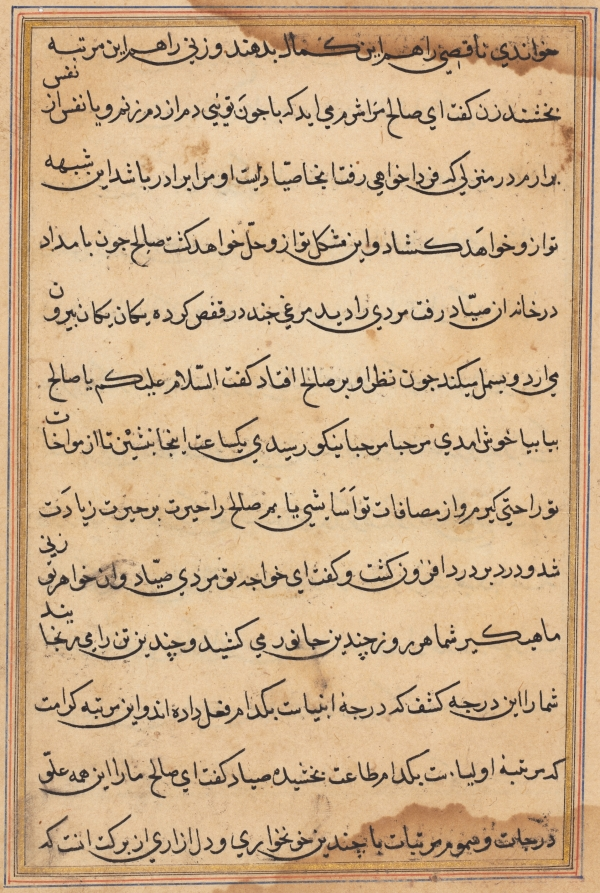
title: Page from Tales of a Parrot (Tuti-nama): text page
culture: Mughal India, court of Akbar (reigned 1556–1605)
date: c. 1560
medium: gum tempera, ink, and gold on paper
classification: Painting